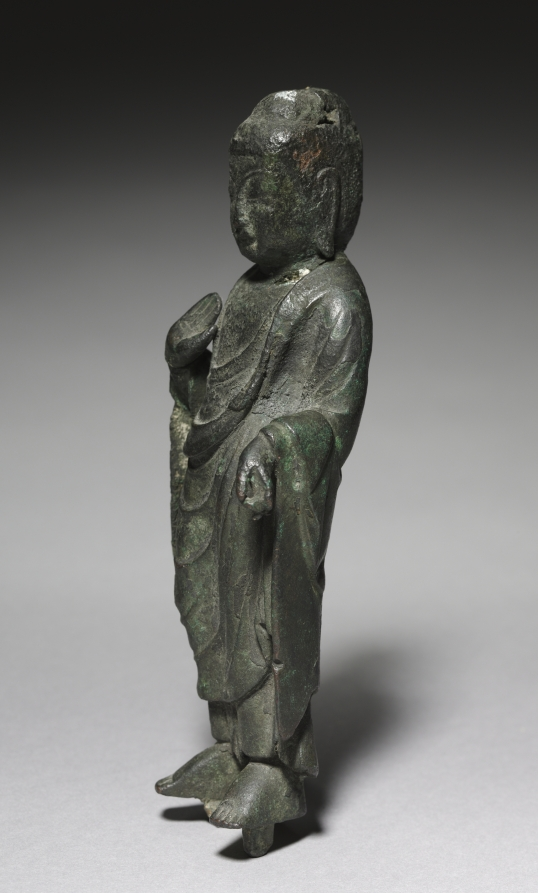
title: Standing Buddha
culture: Korea, Unified Silla period (676-935)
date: 676–935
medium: bronze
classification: Sculpture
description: This kind of miniature statue was often used as a portable object of devotion by traveling Buddhist monks.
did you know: Created during the Unified Silla period, a high point of the spread of Buddhist teachings, this kind of miniature statue was often used as a portable object of devotion by traveling Buddhist monks.